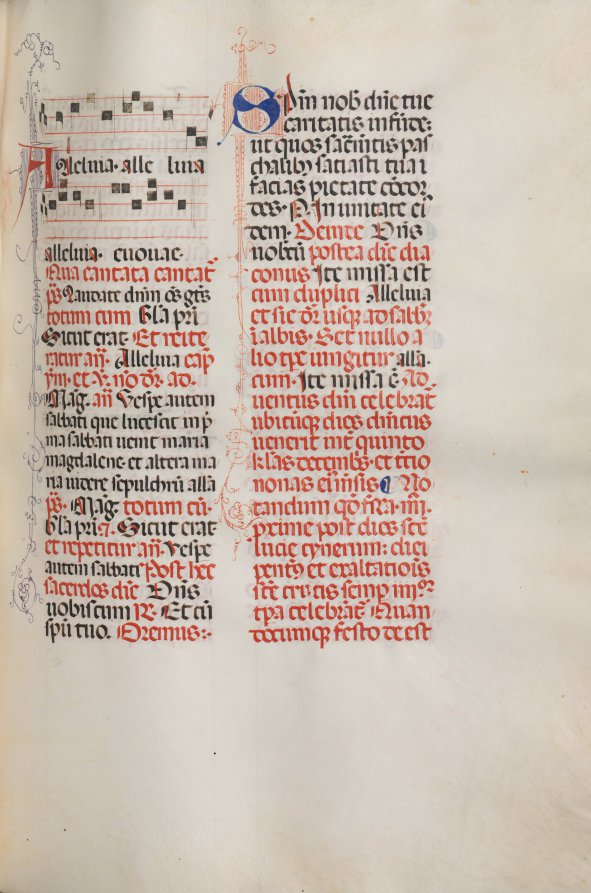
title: Missale: Fol. 173: Music for "Alleluia" etc. at beginning of Easter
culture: Italy, Perugia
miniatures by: Bartolommeo Caporali (Italian, c. 1420–1503)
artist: assisted by Giapeco Caporali (Italian, d. 1478)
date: 1469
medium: ink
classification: Bound Volume